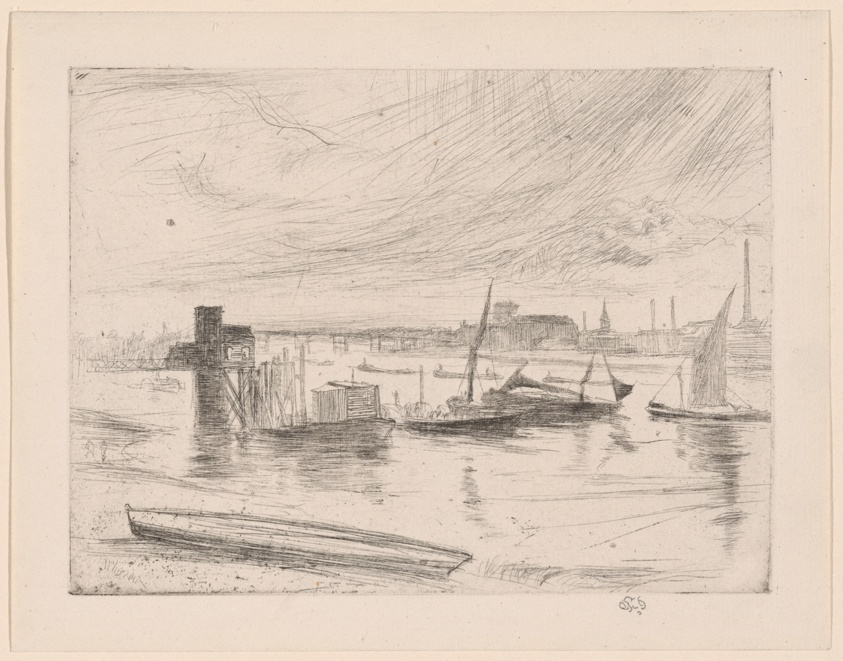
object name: Print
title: Battersea Dawn (Cadogan Pier)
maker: James McNeill Whistler (American, 1834-1903)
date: 1861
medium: Etching and drypoint with foul biting in black ink on ivory laid paper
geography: United States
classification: etching; foul biting; print; prints and drawing; drypoint; paper